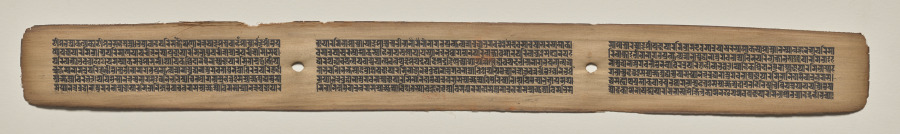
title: Text, folio 163 (recto), from a Manuscript of the Perfection of Wisdom in Eight Thousand Lines (Ashtasahasrika Prajnaparamita-sutra)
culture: Eastern India, Bihar, Vikramashila Monastery. Painting: Nepal, Kathmandu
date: Sunday, September 14, 1119 (year 239 of the Newar Samvat in the month of Ashvina)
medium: gum tempera and ink on palm leaves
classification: Painting